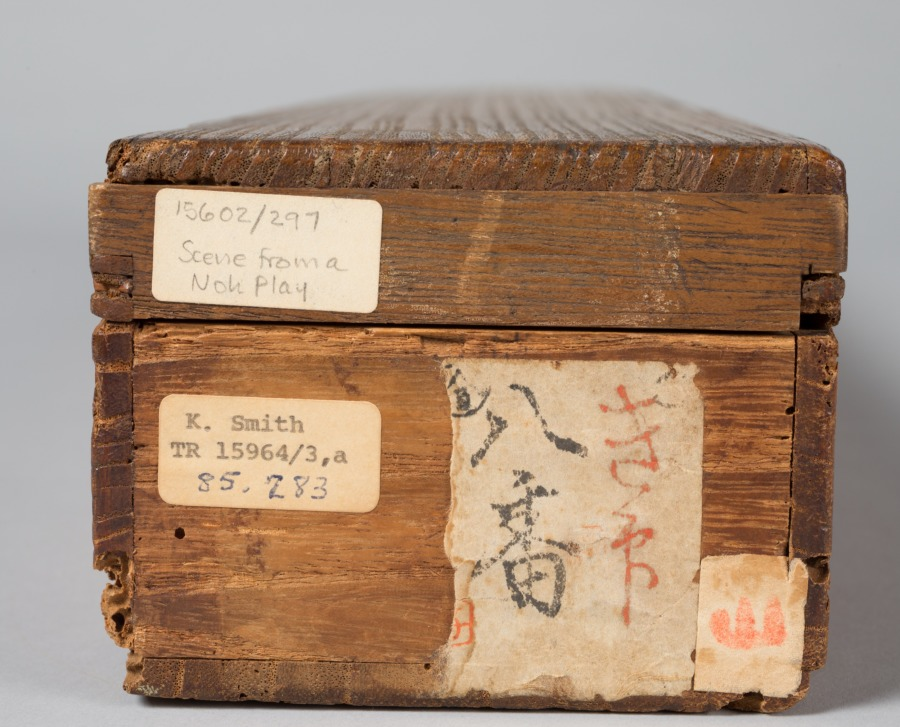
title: Scene from a Noh Play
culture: Japan, Edo period (1615–1868)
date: early 1700s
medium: hanging scroll; ink, color, and gold on paper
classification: Painting